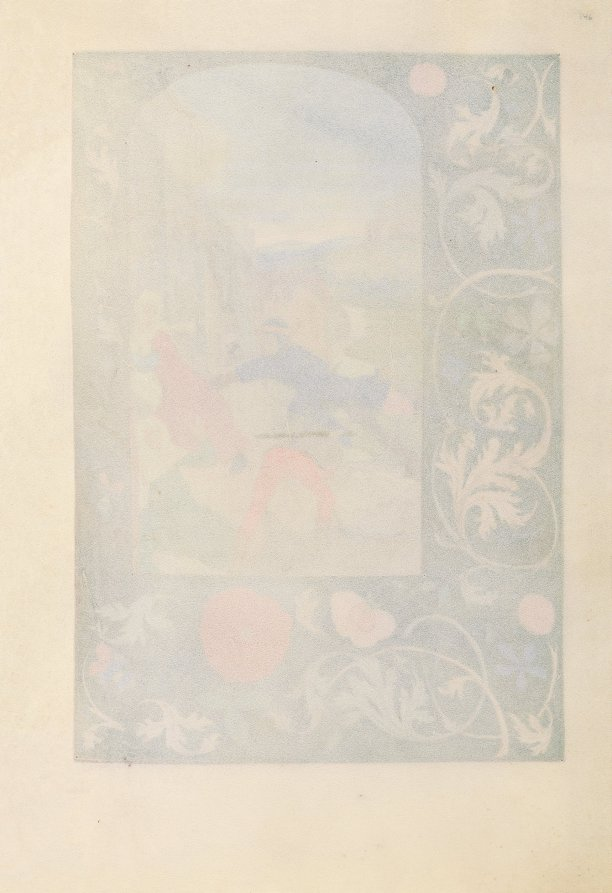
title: Hours of Queen Isabella the Catholic, Queen of Spain: Fol. 146r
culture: Flanders, Ghent and Bruges, late 15th century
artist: Master of the First Prayerbook of Maximillian (Flemish, c. 1444–1519)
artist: and Associates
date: c. 1500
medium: ink, tempera, and gold on vellum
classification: Bound Volume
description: This manuscript was illuminated by a circle of at least five highly organized manuscript painters active in the Flemish cities of Ghent and Bruges. The principal illuminator was Alexander Bening, who painted the majority of the book's miniatures. Manuscripts produced by this circle of artists are renowned for the decoration of their borders, which typically feature a rich variety of realistically-painted flowers, birds, and butterflies. This prayer book, called a book of hours, was intended not for a cleric, but for the private devotions of a lay person-in this case, Isabella the Catholic, Queen of Spain (1451-1504). Isabella's coat of arms embellishes the book's frontispiece. It is unlikely that the book was commissioned by the Queen herself; rather, she probably received it as a diplomatic gift from someone courting her patronage, perhaps Cardinal Francisco Jimenez de Cisneros. A Franciscan friar, Jimenez was dependent upon Isabella for his advancement, first to the post of Queen's confessor in 1492, and then to Archbishop of Toledo in 1495.